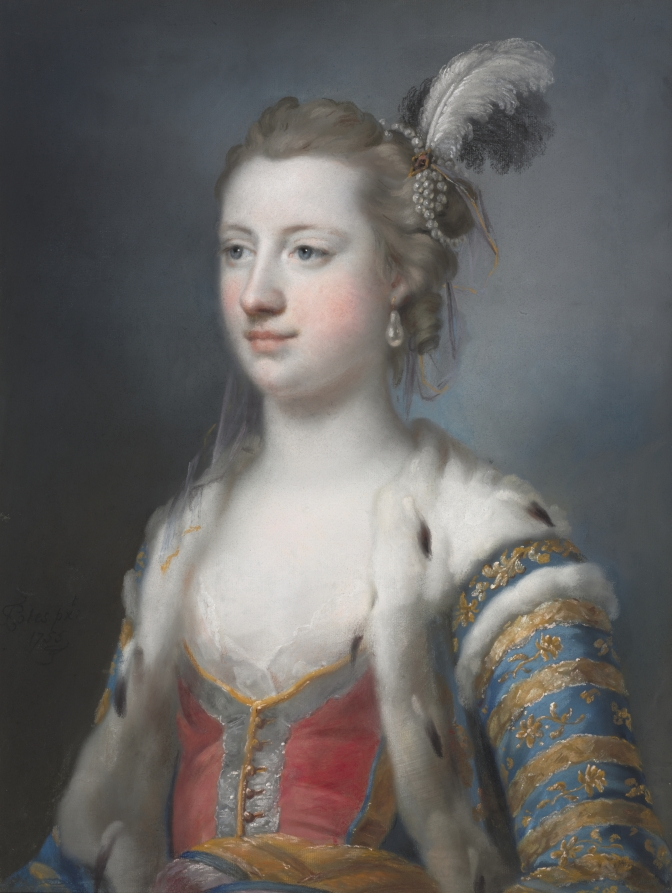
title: The Right Honorable Lady Mary Radcliffe (1732-98), Wife of Francis Eyre, Esq.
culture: England, 18th century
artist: Francis Cotes (British, 1726–1770)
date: 1755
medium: pastel on laid paper lined with canvas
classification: Drawing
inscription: Inscribed, at lower left, in black chalk: Cotes pxt. / 1755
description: A founding member of the Royal Academy and one of the leading fashionable portrait painters of his generation, Francis Cotes was a pioneer of pastel painting in England. Here, in her marriage portrait, the young Lady Mary Radcliffe is regal in a Turkish-inspired, peacock blue mantle decorated with gold and trimmed with ermine. Pearls and feathers adorn her hair and a décolleté scarlet bodice reveals an expanse of porcelain skin.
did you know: Francis Cotes described his pastel works as "decorative in a very high degree in apartments that are not too large; for having their surface dry, they partake in appearance of the effect of Fresco, and by candle light are luminous and beautiful beyond all other pictures."